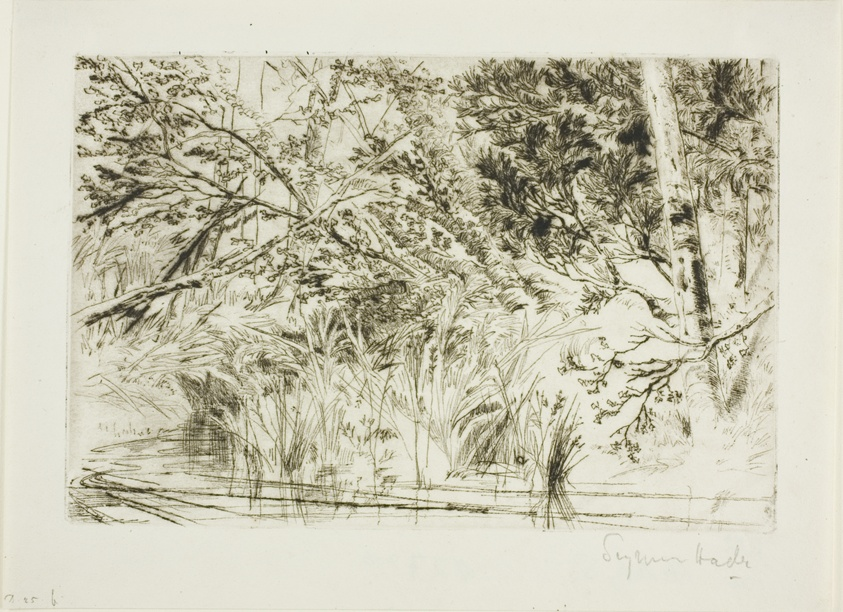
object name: Print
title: Mouth of a Brook, No. II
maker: Francis Seymour Haden (English, 1818-1910)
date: c. 1859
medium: Drypoint on ivory wove paper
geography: England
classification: etching; print; prints and drawing